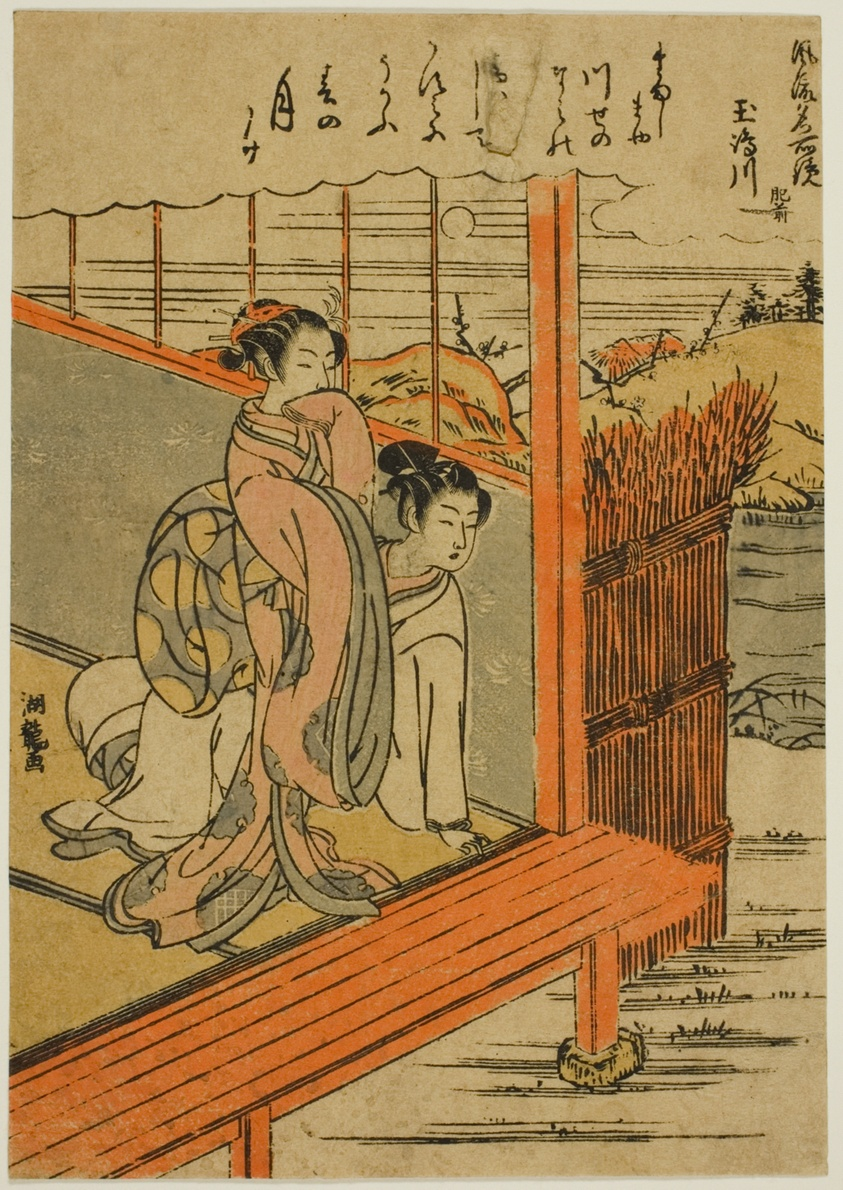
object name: Print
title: Tamashima River in Hizen Province (Tamashimagawa, Hizen), from the series "Fashionable Mirrors of Famous Places (Furyu meisho kagami)"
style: Japanese (culture or style)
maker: Isoda Koryusai (Japanese, 1735-1790)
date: c. 1770/72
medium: Color woodblock print; koban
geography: Japan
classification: woodblock print; print; asian art